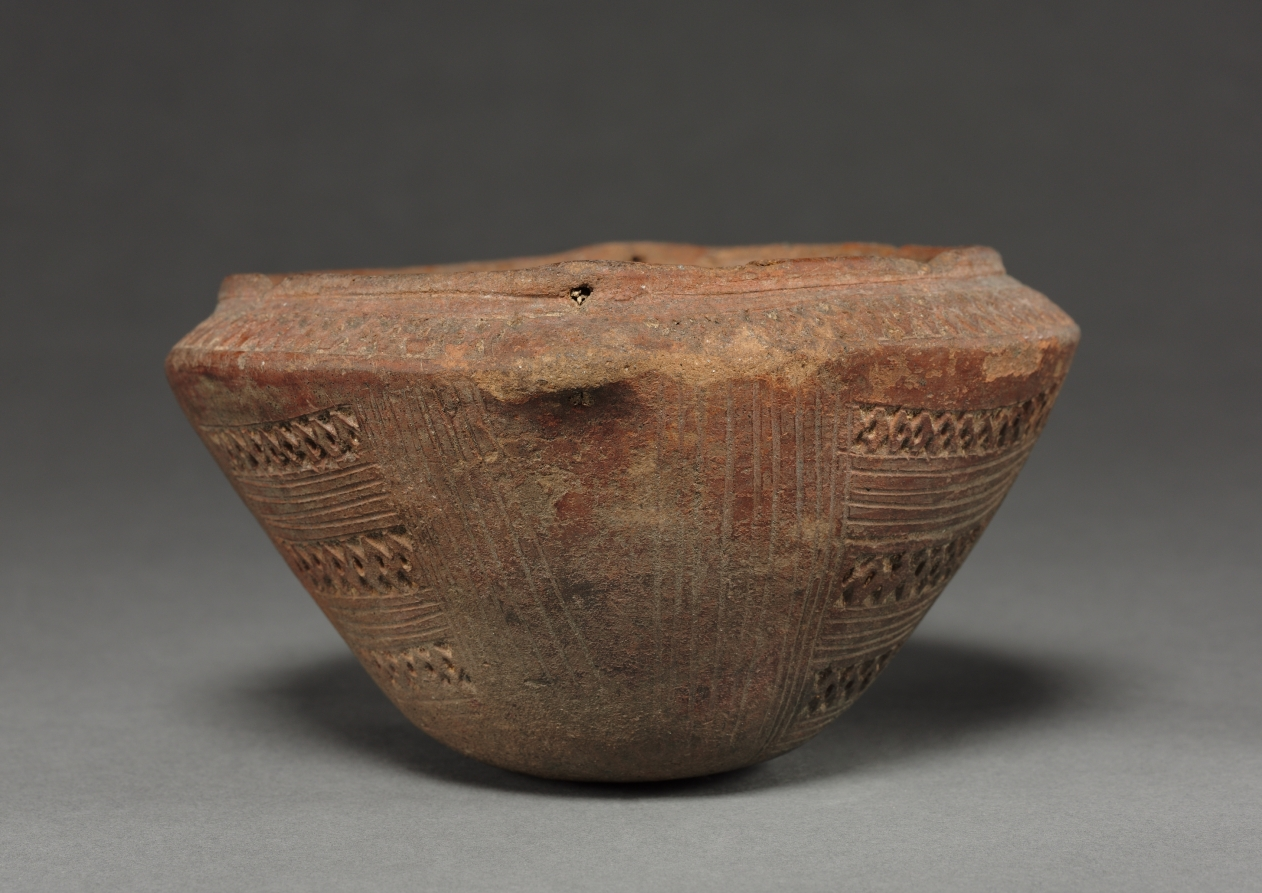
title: Jar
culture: Colombia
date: before 1550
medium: red ware with incised patterns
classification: Ceramic